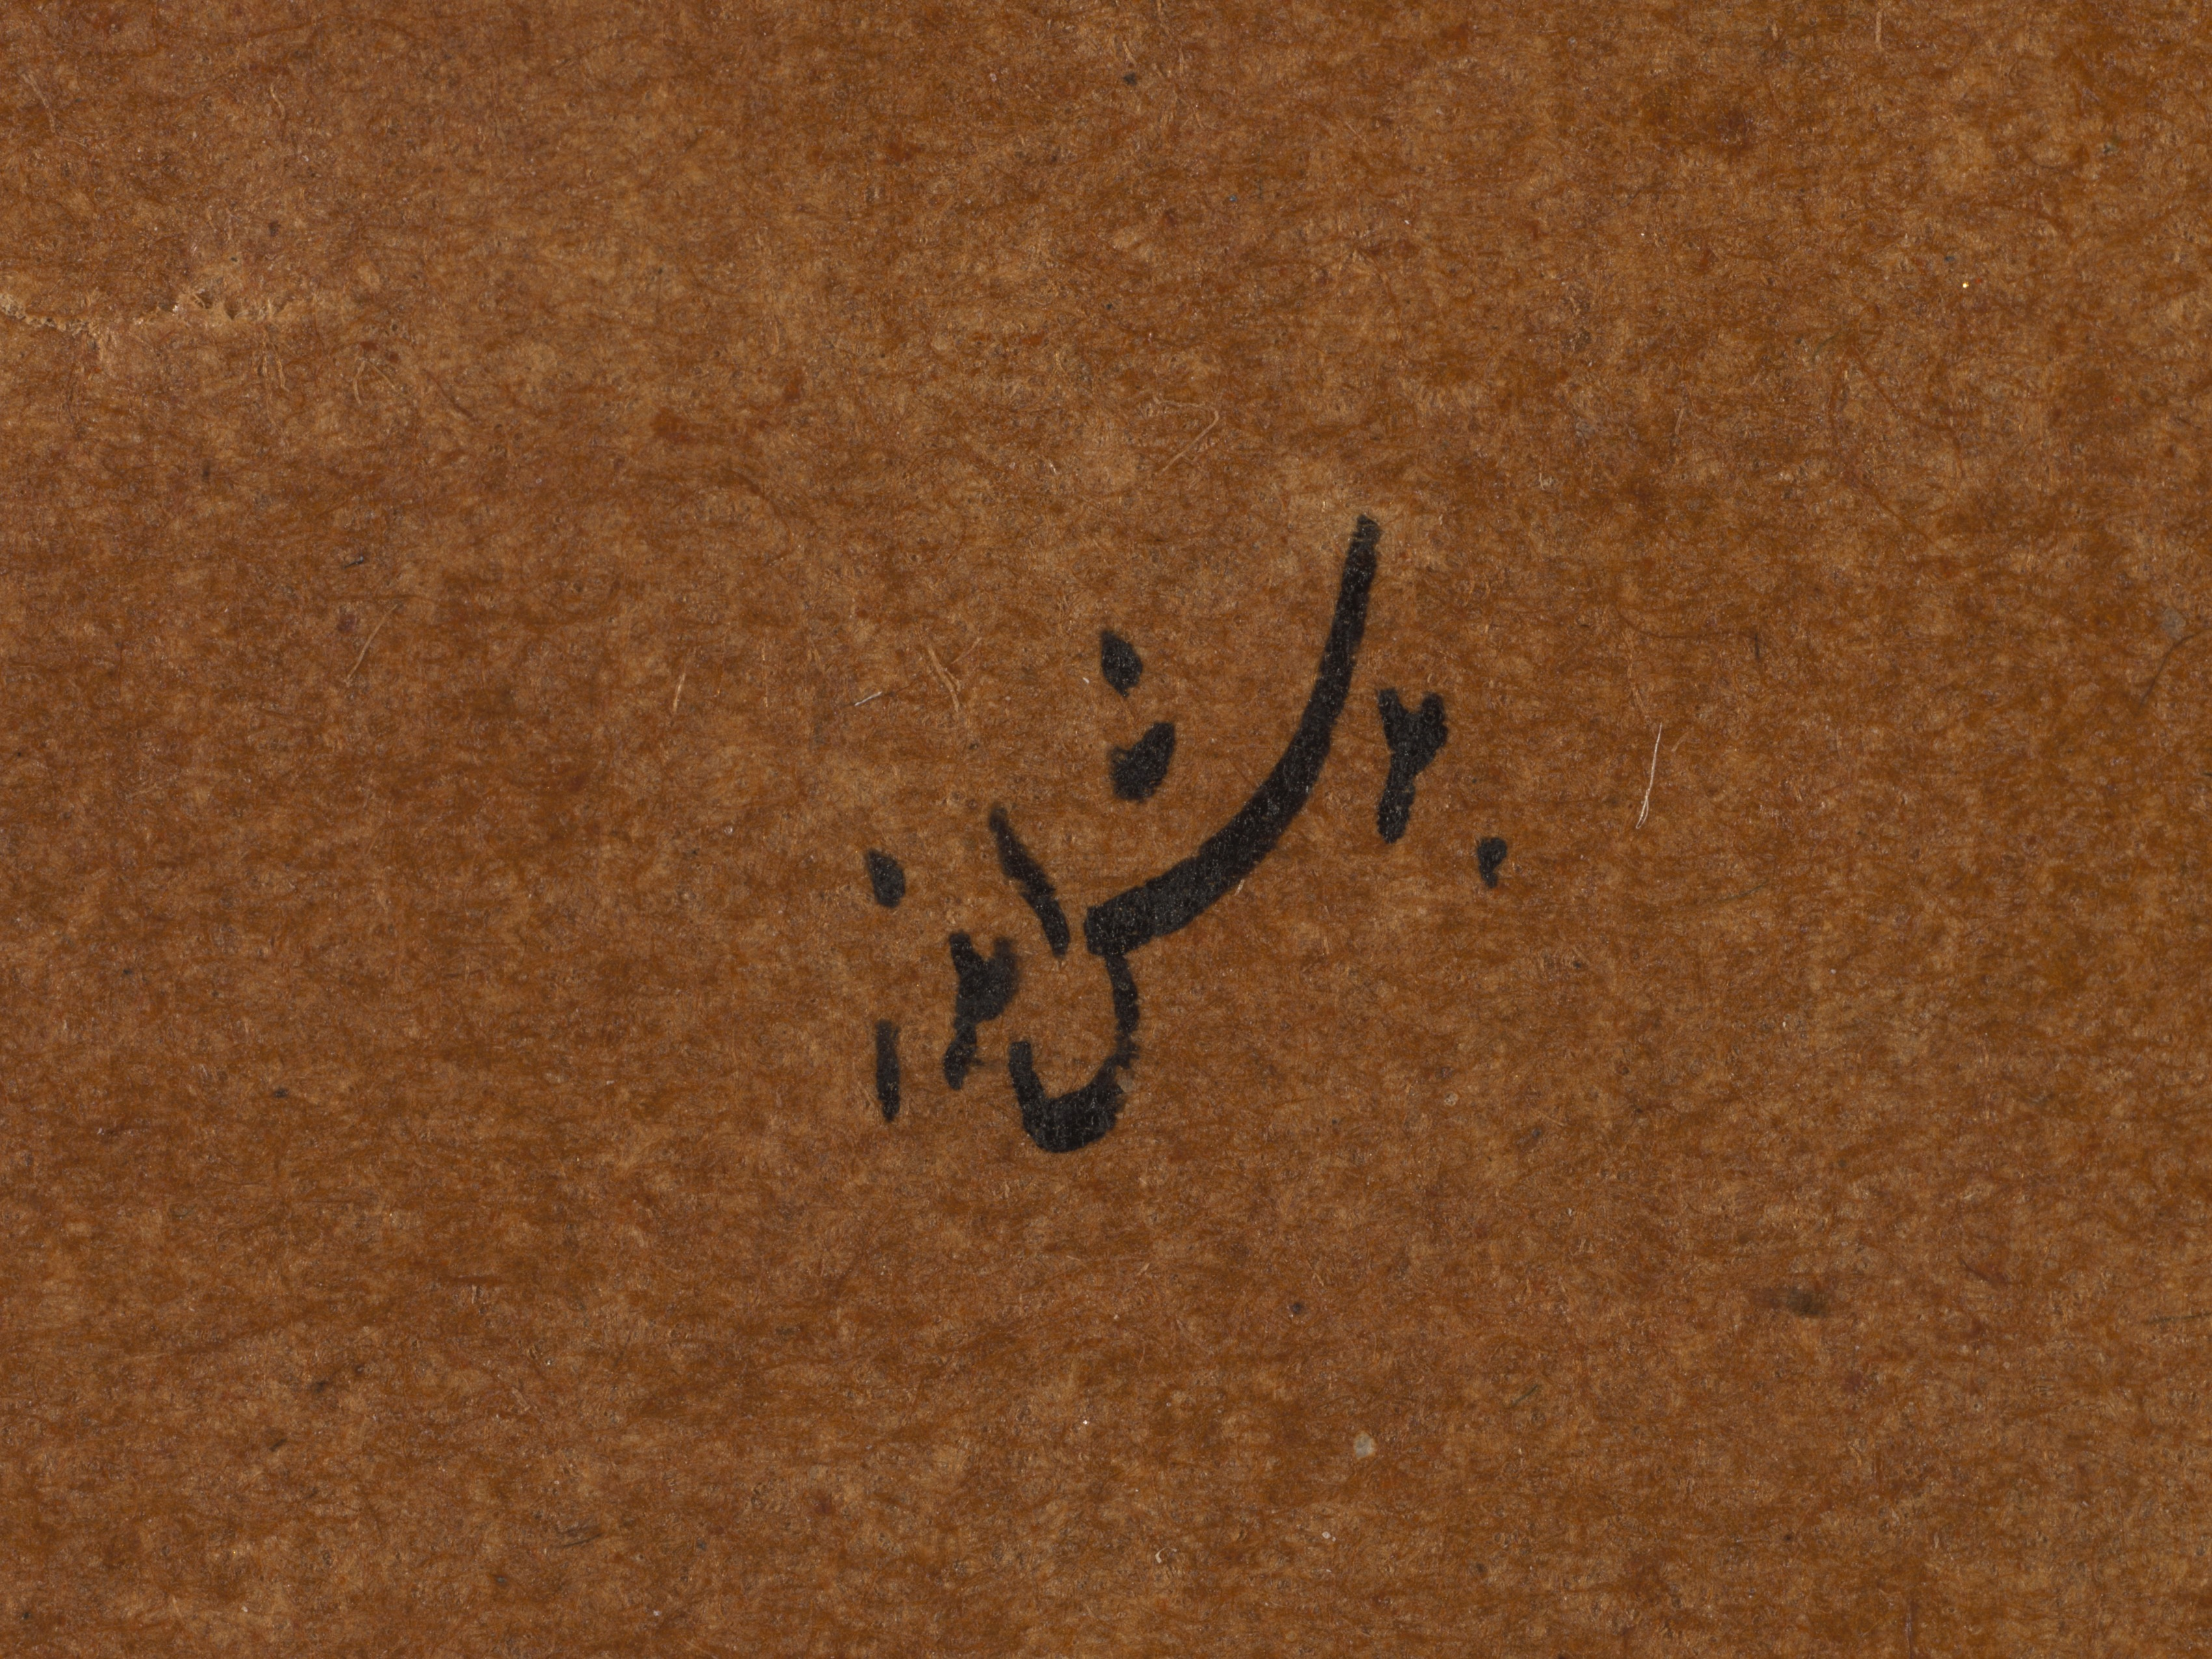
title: Bijan killing the wild boars of Irman, from a Shah-nama (Book of Kings) of Firdausi (Persian, about 934–1020), (recto)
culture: India, Bijapur, Deccan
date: c. 1610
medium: Gum tempera, ink, and gold on paper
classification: Painting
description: This illustrated page from a Shah-nama depicts the first adventure of the hero Bijan, son of an Iranian knight. When reports arrived at the king’s court of wild boars ravaging the borderlands between the enemy realms of Iran and Turan, Bijan volunteered to hunt and kill the beasts, much to the chagrin of his father, who doubted his young son’s ability to navigate the politically volatile situation. The fearless Bijan is shown on horseback as he singlehandedly strikes down on the bodies of the wild boars in the brush. After overzealously celebrating his success, Bijan must be rescued from a pit by Rustam. This early manuscript from the Deccan made for the sultan of Bijapur is characterized by glowing colors and lavish use of gold.